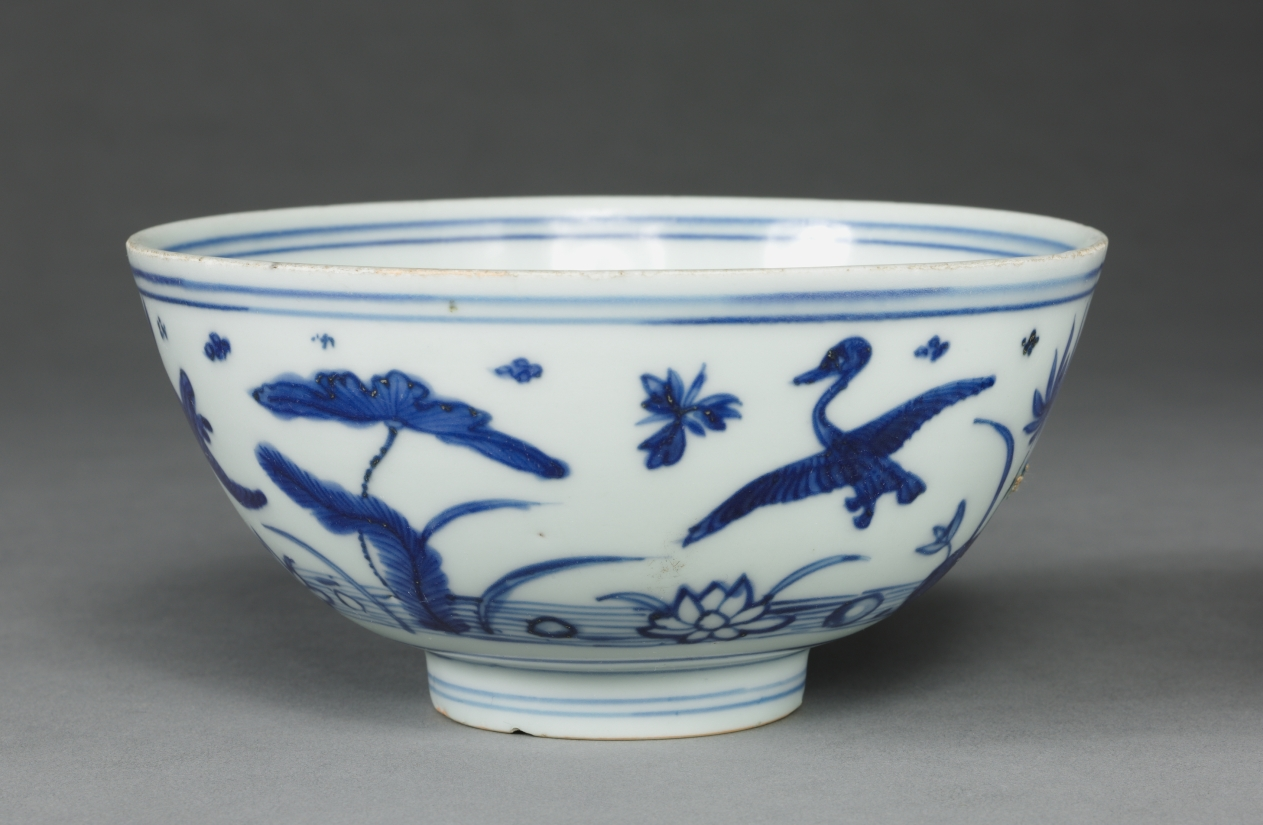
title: Bowl with Ducks over Lotus Pond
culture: China, Jiangxi province, Jingdezhen kilns, Ming dynasty (1368-1644), Wanli reign (1573-1620)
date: 1573–1620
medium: porcelain with underglaze blue decoration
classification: Ceramic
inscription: 永保長春